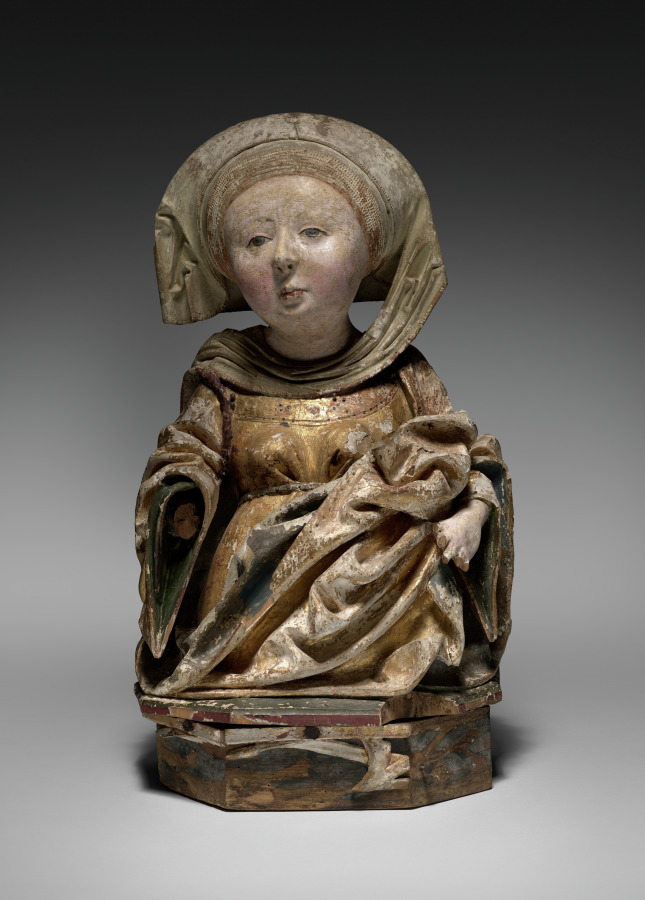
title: Female Bust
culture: Austria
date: c. 1470–1500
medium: Painted and gilded lindenwood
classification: Sculpture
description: This female bust is part of a series of three in the museum's collection. The identity of the figures has been speculated by scholars but without resolution. Because this and the other female busts in the series do not retain their attributes, it is difficult to know their original purpose. It is possible that they may have once formed a group of female saints from the predella of a large altarpiece. Since the sculpture is not carved in the round, this hypothesis has merit. Another recent proposal is that this and the other sculptures may be from a series of female busts representing the wise and foolish virgins referenced in Matthew 25:1-13, a parable by Jesus admonishing listeners to be spiritually prepared.